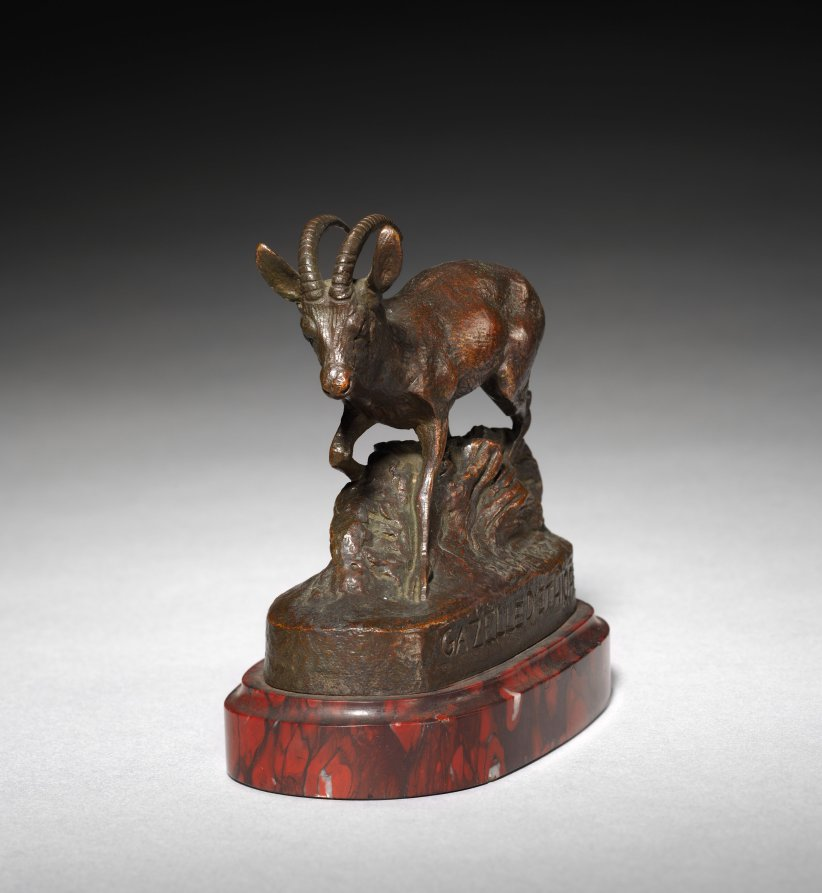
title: Gazelle d'Ethiopie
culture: France, 19th century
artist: Antoine-Louis Barye (French, 1796–1875)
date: 1887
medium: bronze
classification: Sculpture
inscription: Signed: "Barye 1887 Gazelle d'Ethiopie"